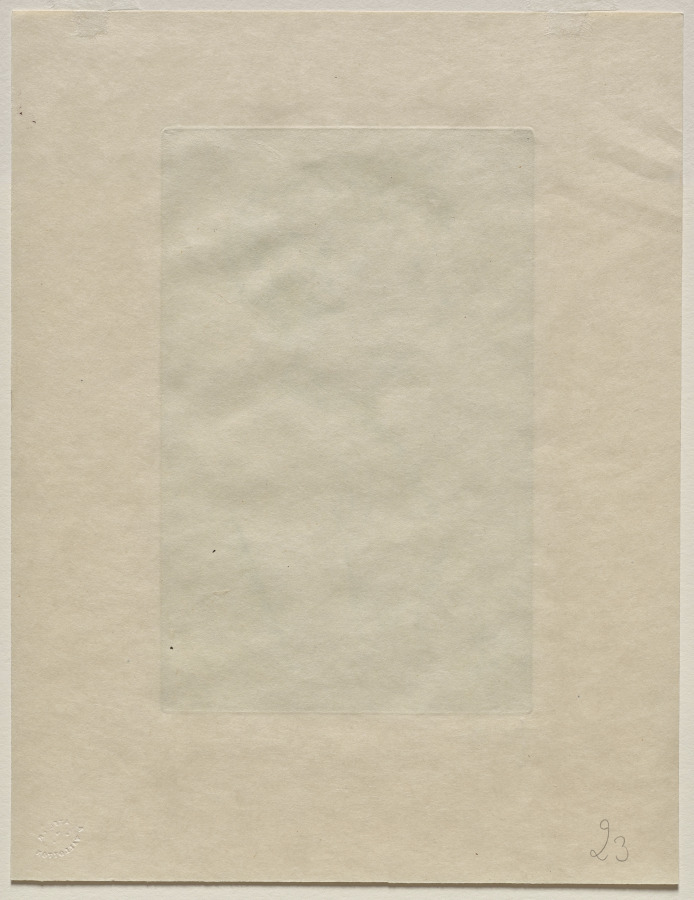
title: Young Girl in Profile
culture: Switzerland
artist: Félix Vallotton (Swiss French, 1865–1925)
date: 1891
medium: drypoint on ivory wove paper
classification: Print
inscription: initialed and inscribed, lower left on plate: FV / 1891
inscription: stamped, in black ink, lower left: fv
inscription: inscribed, in pencil, lower left: 5/5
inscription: blind stamped, lower right: atelier stamp [Lugt 2478b]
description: This print depicts Hélène Chatenay, a seamstress who became Félix Vallotton’s partner during the 1890s. The two lived together in Paris’s Latin Quarter until Vallotton abruptly married Gabrielle Rodrigues-Henriques in 1899 and assumed her haut bourgeois lifestyle. During their years together, Chatenay was a frequent model for Vallotton and the profile view seen here was also realized as a drawing two years earlier.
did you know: Although well known for his woodcuts, Félix Vallotton made only 23 etchings, all around 1890. He began by making copies after Rembrandt and other past masters in the late 1880s before moving on to his own subjects, mostly figures and cityscapes.